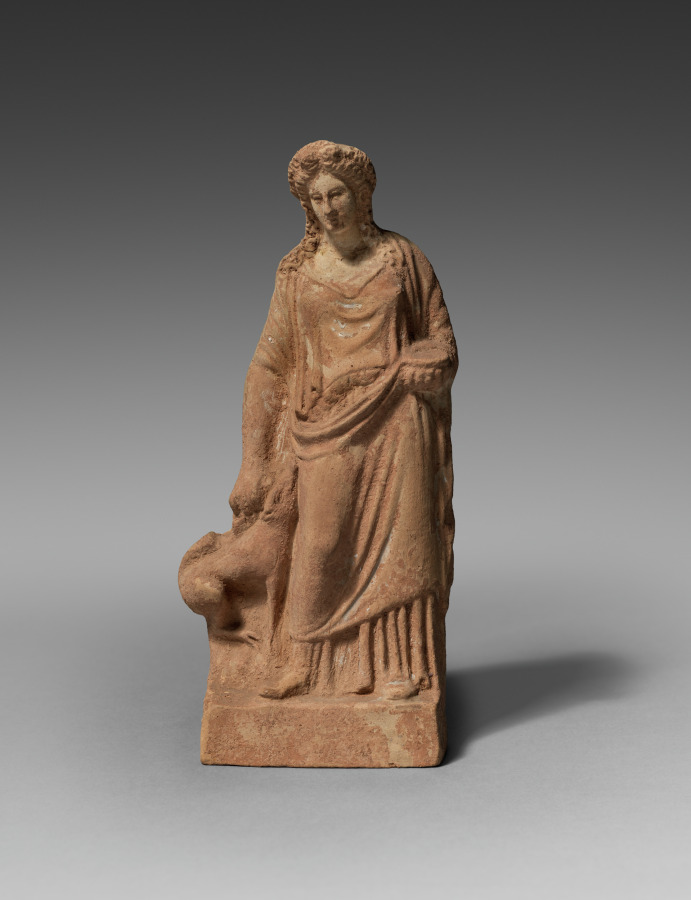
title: Figurine of Demeter with Pig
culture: Greece, Athens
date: 400s BCE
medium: terracotta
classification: Sculpture